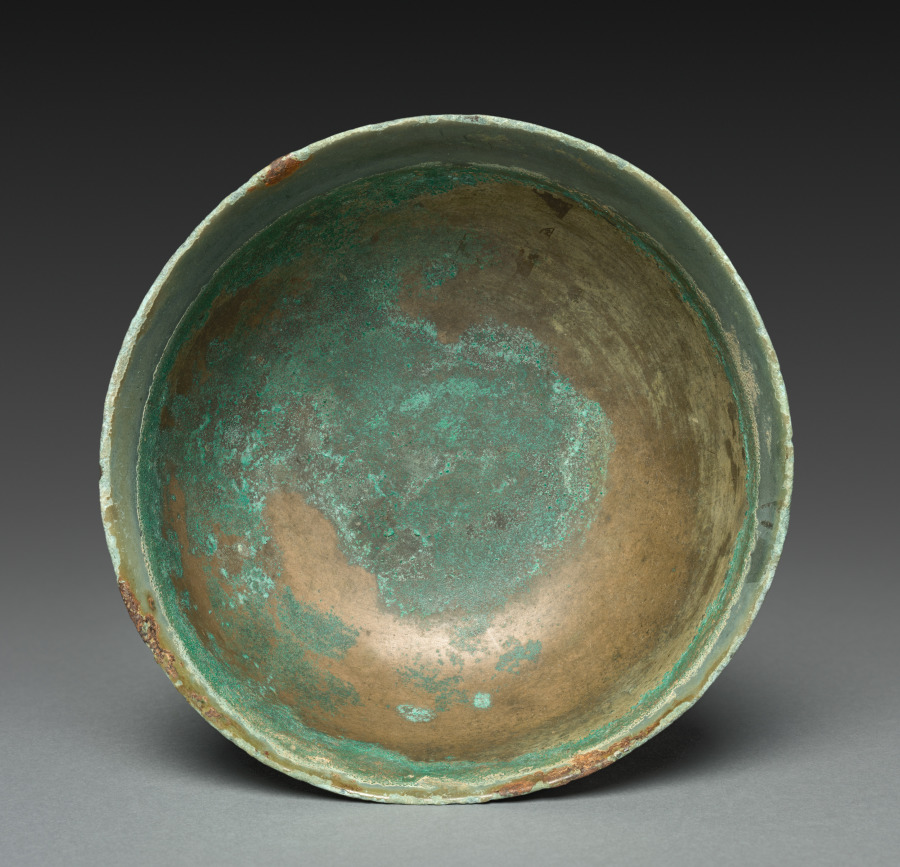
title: Bowl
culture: Korea, Joseon dynasty (1392–1910)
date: 1700s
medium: bronze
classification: Metalwork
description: In ancestor veneration rituals, deceased parents or ancestors are sanctified as spirits who are believed to oversee their descendants. Three times a year, once at the lunar new year, once at the person’s death date, and once at the time of the mid-autumn festival, food would be placed on the table for the ancestors, including fruits, rice, meat, and rice wine. During these ceremonies the worshippers’ attitude was as reverential toward the objects meant to embody the ancestors’ spirits as that toward a living parent. This cup may have been used for ancestral rituals to contain rice wine.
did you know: This bronze bowl may have been used in family rituals such as ancestral worship ceremonies in the Joseon period.